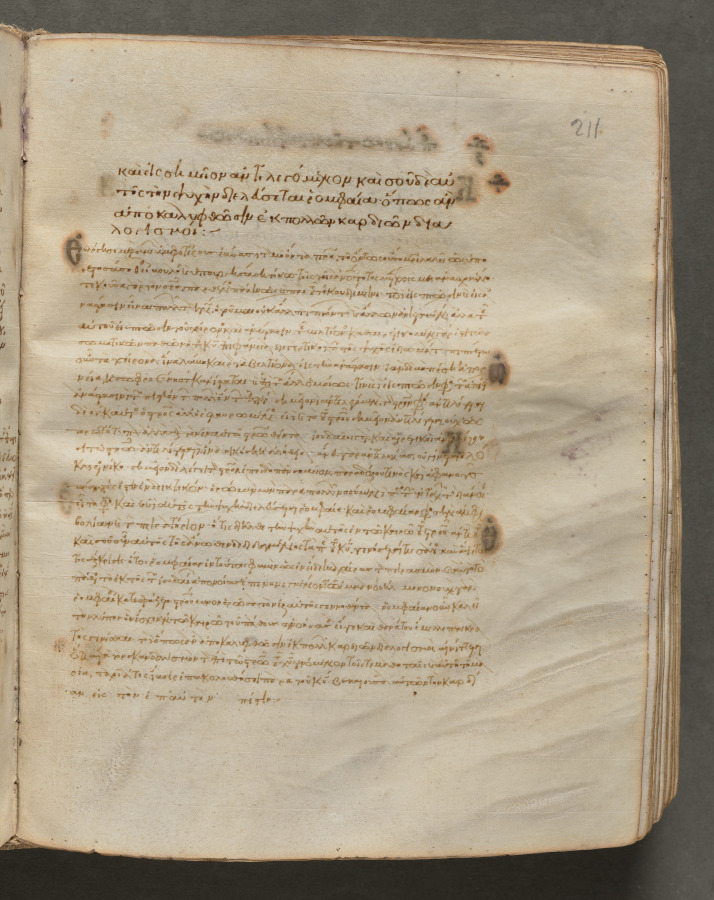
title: Text, folio 211 (recto), from a Gospel Book with Commentaries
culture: Byzantium, Constantinople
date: c. 1000–1100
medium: ink, tempera, and gold on vellum; leather binding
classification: Bound Volume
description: Each of the four gospels in this book opens on a page with brilliantly illuminated borders depicting the author of the text as well as birds-principally peacocks, symbols of the immortality of the soul-and fountains, representing the fountain of life and the salvation of the soul. This volume consists of 428 leaves with texts in Greek. Its level of sophistication suggests that it was probably written and decorated in a monastery in Constantinople.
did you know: Gospel Books were carried in procession through Byzantine churches.